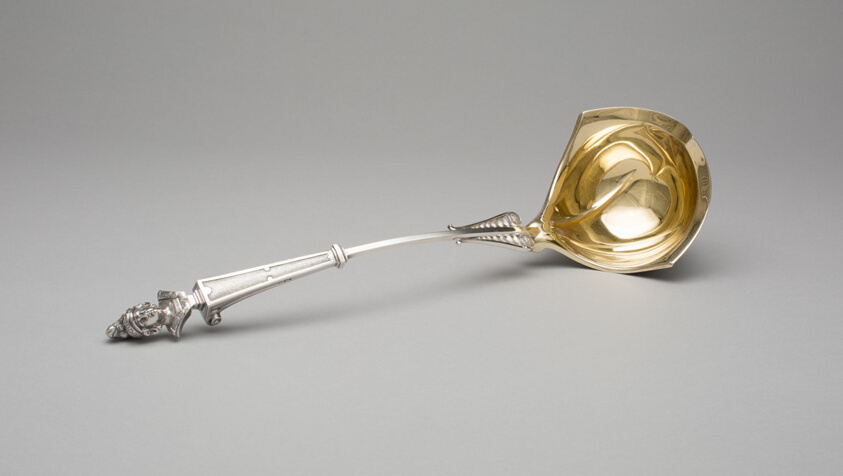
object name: Metalwork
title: Ladle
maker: Wood & Hughes; American, 1845–1899; New York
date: 1865–70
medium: Silver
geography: New York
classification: silver; american decorative arts; american arts; decorative arts